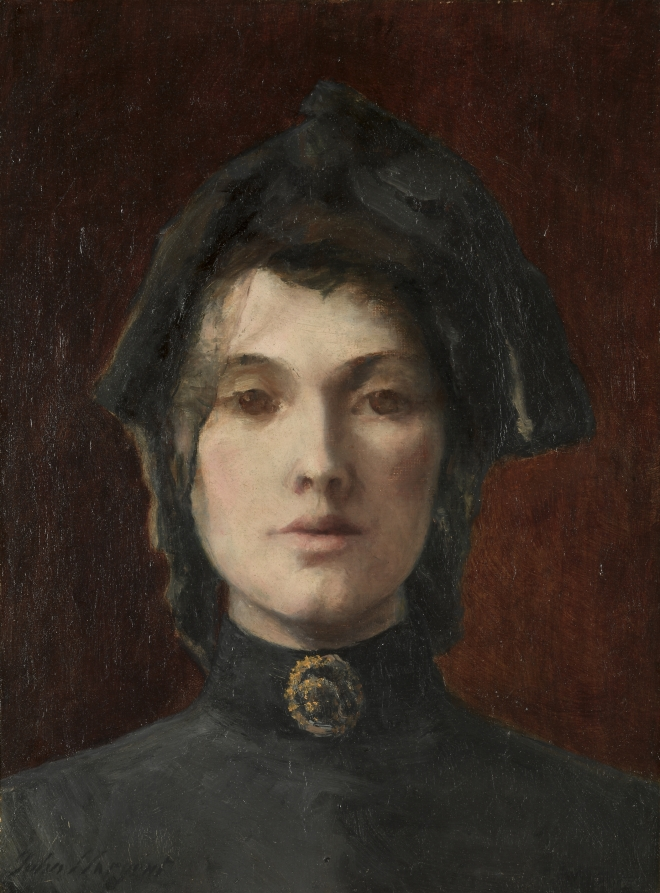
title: Head of a Girl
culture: United States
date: before 1929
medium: oil on canvas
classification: Painting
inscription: Remains of a signature lower right [falsely signed lower left: "John S Sargent"]